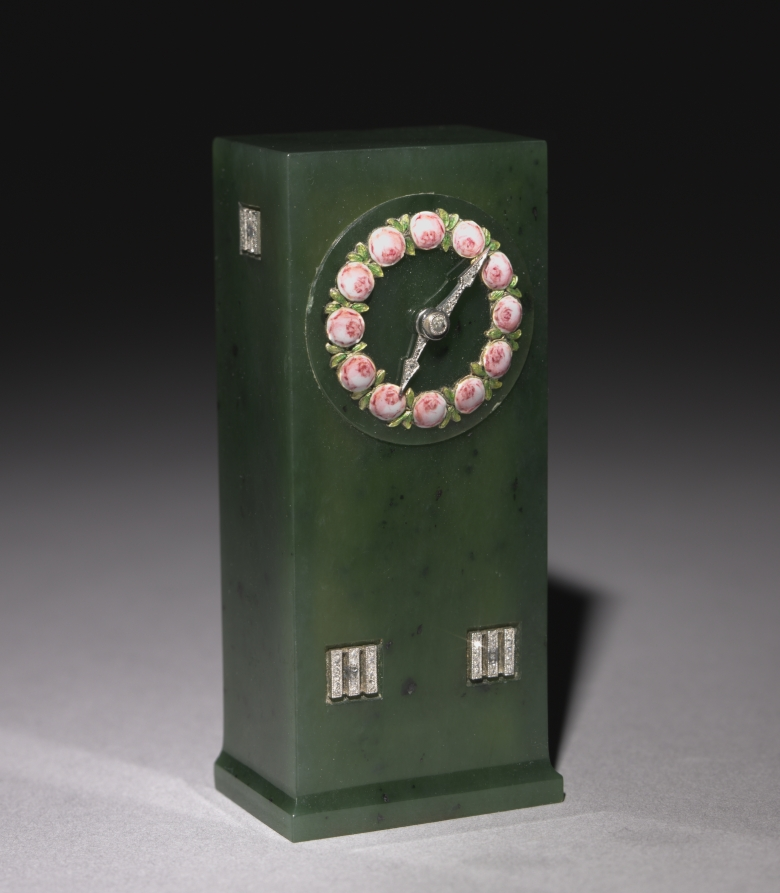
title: Clock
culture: Russia, St. Petersburg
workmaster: Henrik Wigström (Russian, 1862–1923)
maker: House of Fabergé (Russian, 1842–1918)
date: 1908–17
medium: nephrite, gold, enamel, diamonds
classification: Timepiece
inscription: 72, Kokoshnik, lower case alpha in script [assay mark for St. Petersburg, 1908-26]; 72; Fabergé; H.W. [initials of workmaster Henrik Wigström]; 22681 scratched; NS/15P scratched.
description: The use of Russian hardstones in creating precious objects became a hallmark of design from the House of Fabergé. Easily carved, these minerals were sourced largely from the western region surrounding the Ural Mountains. Fabergé's workmasters used colorful stones such as agate, lapis lazuli, rock crystal, rhodonite, and nephrite (jade), seen here in this small desk clock, to create and embellish flower studies, animal figures, and all manner of luxurious accessories.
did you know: The face of this small luxurious desk clock features tiny pink enameled roses in place of the customary numbers along with hour and minute hands paved in diamonds.